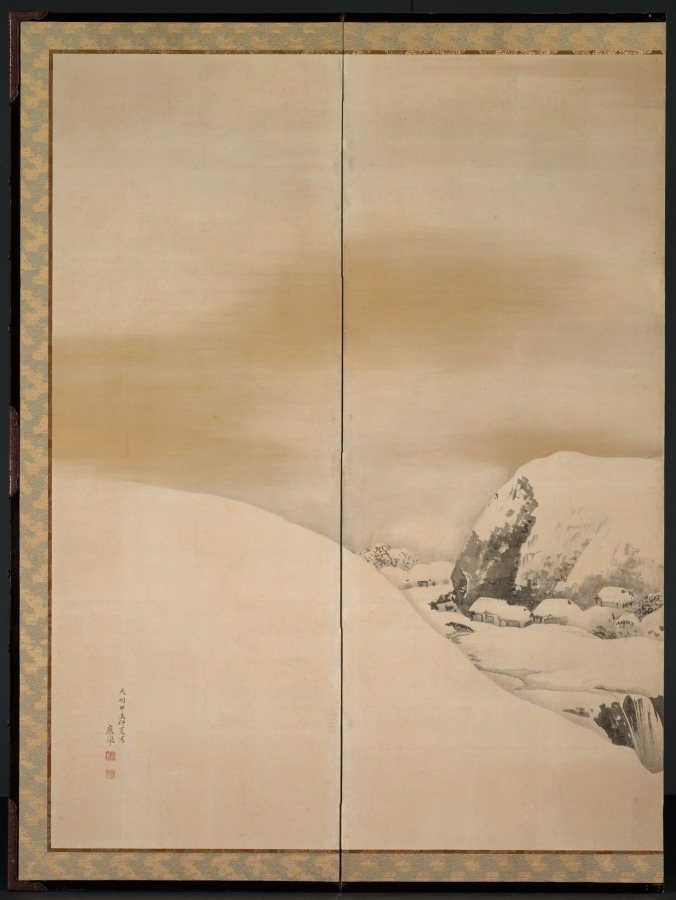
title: Winter Day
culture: Japan, Edo period (1615–1868)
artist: Maruyama Ōkyo (Japanese, 1733–1795)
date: 1784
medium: Six-panel folding screen, ink, gold, and silver on paper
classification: Painting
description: Ōkyo painted these panoramas in the summer of 1784. Regarded as Kyoto's most important painting teacher and accomplished artist, he had studied Western painting techniques, "realistic" sketching from nature, and traditional Japanese style painting (yamato-e). The naturalistic quality of these scenes results from a blend of detailed observation of nature and a remote, even detached regard for man's place in the world.